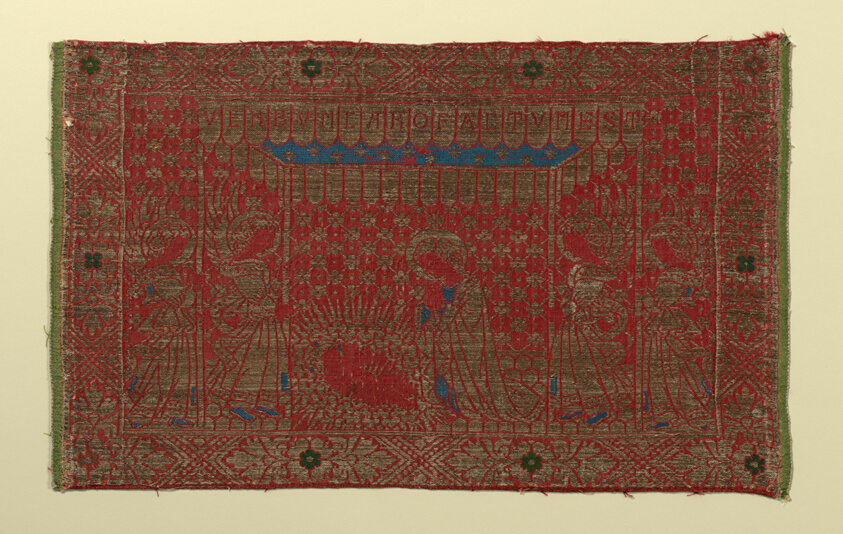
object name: Textile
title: Orphrey Panel (Depicting the Nativity)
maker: Italy, Florence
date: 1450/1500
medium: Silk and gilt-animal-substrate-wrapped linen, warp-float faced 4:1 satin weave with supplementary patterning and brocading wefts bound by secondary binding warps in a weft-float faced 2:1 twill interlacing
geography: Florence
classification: textile; weaving; liturgical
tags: knots, mythology